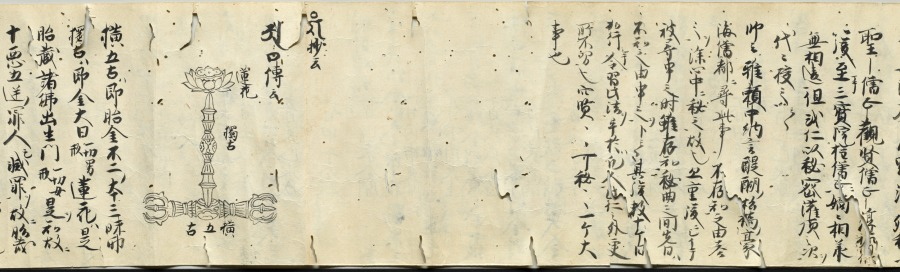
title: Scroll of Miscellaneous Notes written on a Calendar by Priest Seigen (recto)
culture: Japan, Kamakura period (1185–1333)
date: c. 1200–1231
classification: Manuscript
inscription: bears miscellaneous notes written by Priest Seigen.